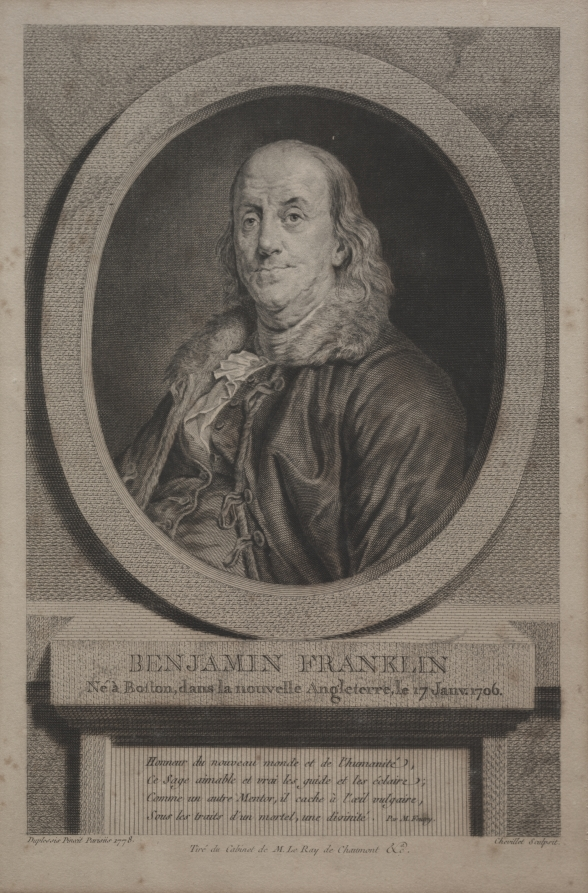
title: Benjamin Franklin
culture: France, 18th century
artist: Justus Chevillet (French, 1729–1802)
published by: Published in Journal de Paris, 7 July 1779 and in the Gazette de France, 16 July 1779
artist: after Jean Claude Thomas Duplessis (French, 1783)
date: 1779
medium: engraving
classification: Print